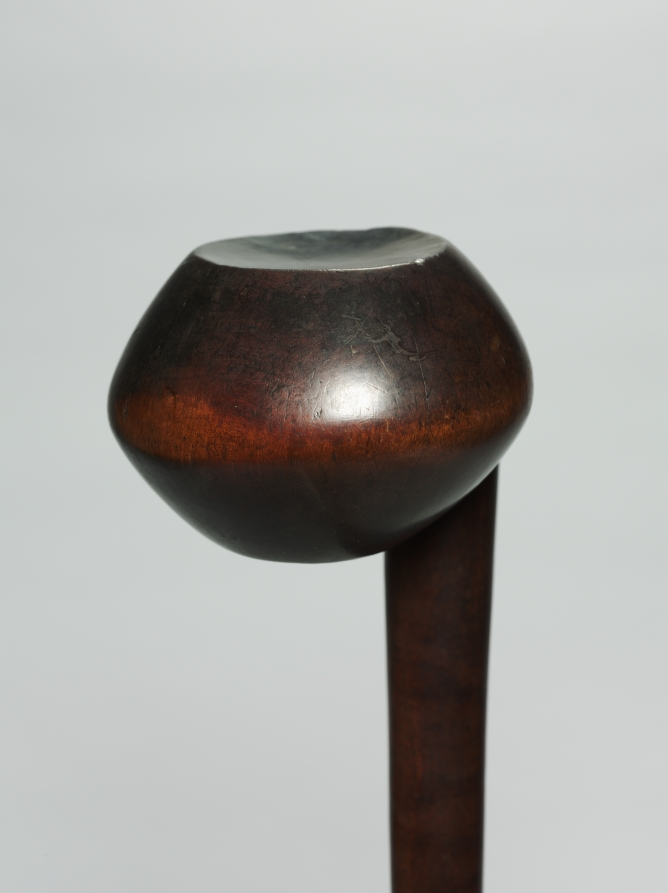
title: Club (Knobkerrie)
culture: Southern Africa, South Africa, Northern Ngun-style or Zulu-style maker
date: late 1800s or early 1900s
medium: Wood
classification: Arms and Armor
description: Relatively short sticks historically used for hunting and fighting are customarily called knobkerries. A combination of Afrikaans and Shona words, the name refers to the characteristic spherical knob of wood (knop) or head atop a cylindrical shaft (kirri). The knobs on these were carved into a tight whorl and a compressed sphere with a central rib. Even though their basic shapes were derived from real weapons, many of these precious objects were rarely if ever used as such. Highly personal, they instead functioned as ceremonial display items or regalia, symbolizing the masculinity and prowess of their owner.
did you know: The term knobkerrie refers to a characteristic spherical knob of wood or head atop a cylindrical shaft.